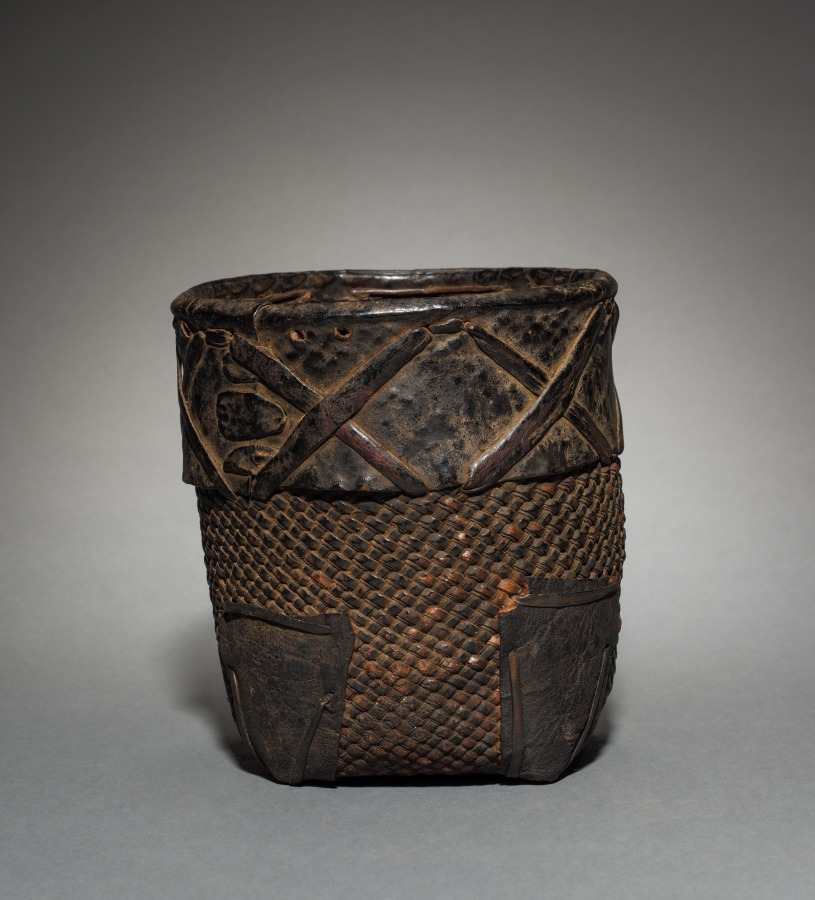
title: One of Ten Nesting Wedding Baskets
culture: Africa, Western Africa, Burkina Faso, Lobi–style maker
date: c. 1900s?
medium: Plant fiber and leather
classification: Vessels